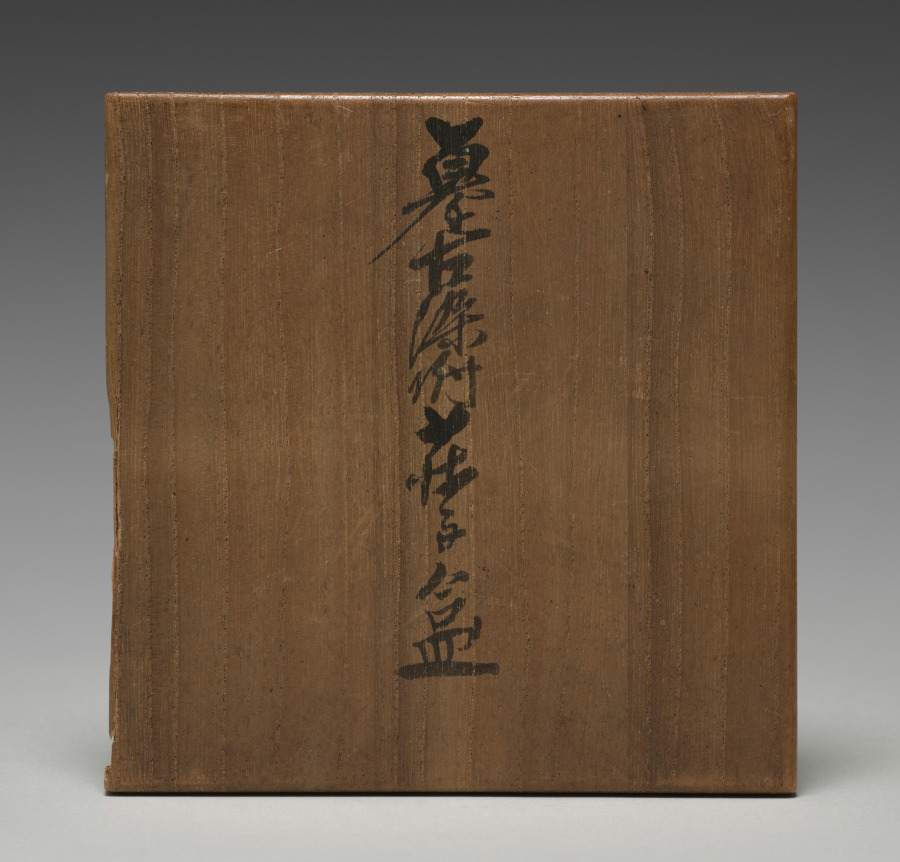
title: Box with Butterfly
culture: Japan, Meiji period (1868–1912)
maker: Seifū Yohei I (Japanese, 1801–1861)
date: 1855–57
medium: Porcelain with underglaze blue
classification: Ceramic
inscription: 清風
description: This sturdy box, with comparatively thick walls and resulting heft, is sparsely decorated with a single butterfly motif in dark underglaze blue cobalt in one corner of the lid and with repeating floral patterns along the lid and base. Single broken lines of underglaze blue define the edge of the box lid’s top where it curves to meet the sides and again where it meets the base of the box. Another blue band runs around the upper rim of the base where it meets the lip, left unglazed for a better grip of the lid when the box is closed. Yohei I’s signature on the center of the recessed base is set within a wide blue square. The porcelain box is meant to call to mind a famous story attributed to Zhuang Zhou (c. 369–286 BCE), also known as Master Zhuang, or Zhuangzi, pronounced Soji in Japanese. The second chapter of Zhuangzi, his eponymous collection of anecdotes, records the story as follows: Once, Zhuang Zhou dreamt he was a butterfly, a butterfly flitting and fluttering about, happy with himself and doing as he pleased. He didn’t know that he was Zhuang Zhou. Suddenly, he woke up and there he was, solid and unmistakable Zhuang Zhou. But he didn’t know if he was Zhuang Zhou who had dreamt he was a butterfly, or a butterfly dreaming that he was Zhuang Zhou. Between Zhuang Zhou and the butterfly there must be some distinction! This is called the Transformation of Things. The lidded box resembles kosometsuke, the porcelains in underglaze blue made to order or on speculation for the Japanese market during the early to mid-1600s in Jingdezhen, China. These works were often made from designs submitted by Japanese clients, many of whom were masters of chanoyu, who sought the wares for their tea practice. The relative roughness of the clay and the distortions in the fired object were intentional, as they created the rustic effect desired by Japanese tea communities.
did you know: It is possible that the model for this box was a smaller lidded box meant for storing incense.